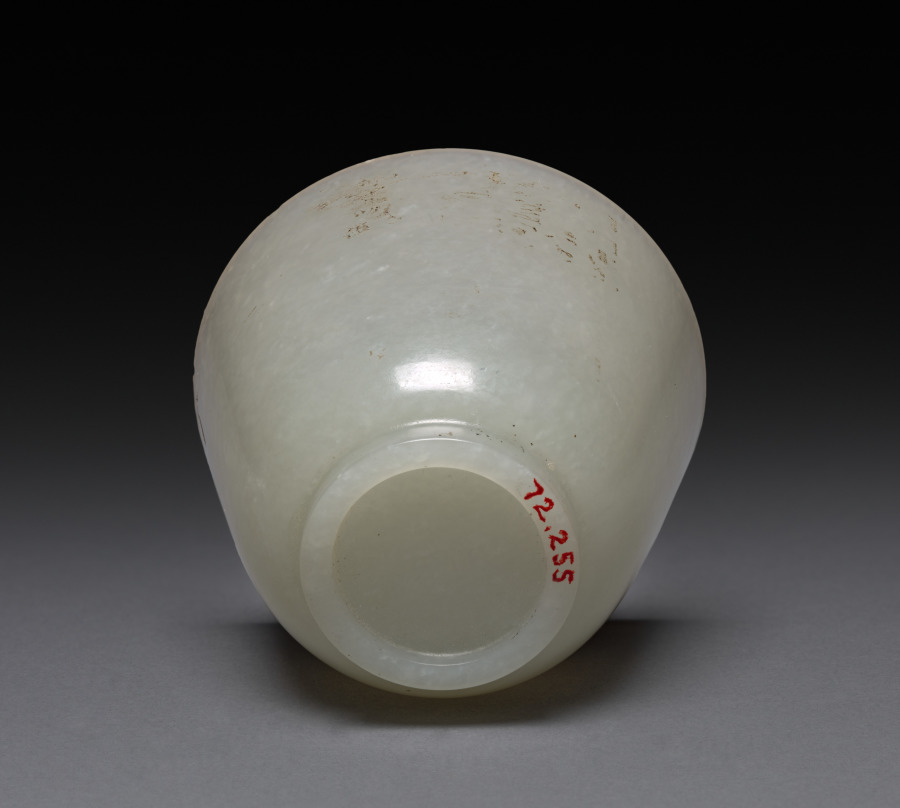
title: Lotus-shaped Dish and Cup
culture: China, Qing dynasty (1644–1911), Qianlong reign (1736–95)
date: 1736–95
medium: jade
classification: Jade